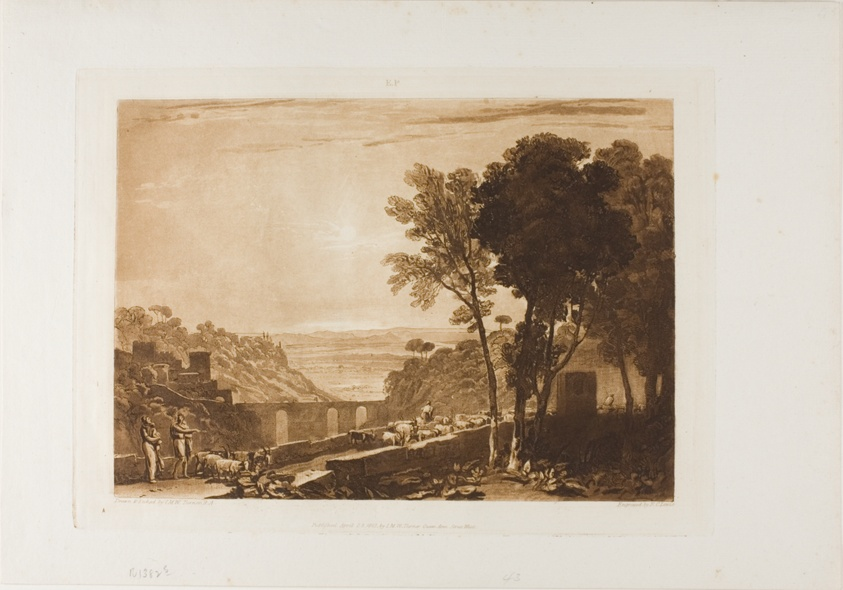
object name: Print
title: The Bridge and Goats, plate 43 from LIber Studiorum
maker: Joseph Mallord William Turner (English, 1775-1851); Engraved by Fredrick Christian Lewis (English, 1779-1856)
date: published April 23, 1812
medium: Etching and engraving in brown on ivory laid paper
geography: England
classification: etching; print; prints and drawing